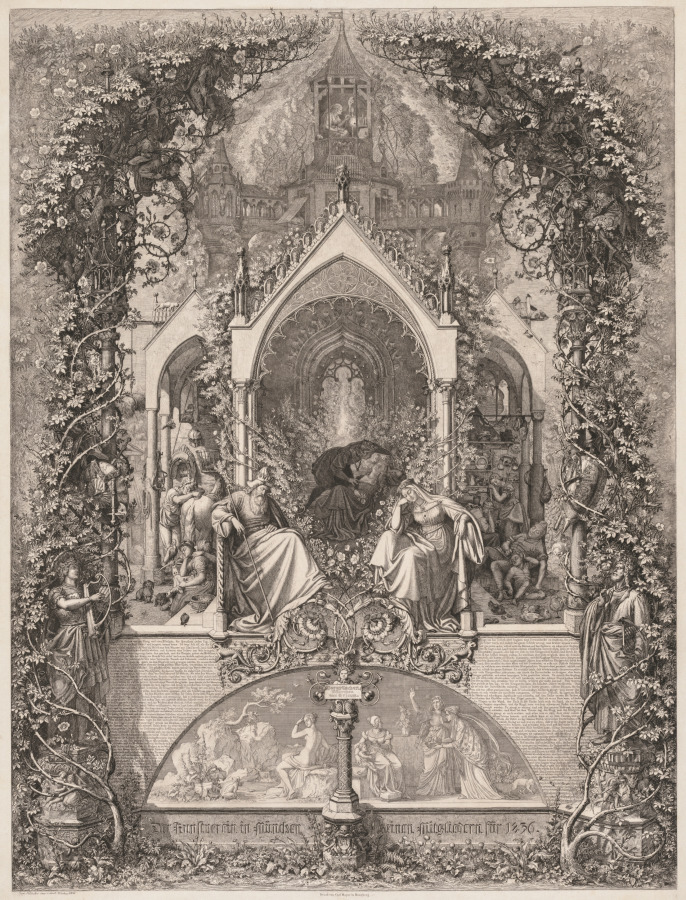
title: Little Briar Rose (Sleeping Beauty)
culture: Germany, 19th century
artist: Eugen Napoleon Neureuther (German, 1806–1862)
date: 1836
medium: steel etching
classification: Print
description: Eugen Napoleon Neureuther depicted a key episode from a classic fairy tale. The title character in Little Briar Rose is awakened from an enchanted sleep by a prince’s kiss. Neureuther centered the composition on the meeting with the prince that leads to the story’s happy ending. His portrayal coincided with a revived interest in such folktales in Germany during the 1800s, culminating in the publication of the Brothers Grimm’s Children’s and Household Tales in 1812. Neureuther used that book’s versions of the two tales as source material, even including a story’s text in one print.